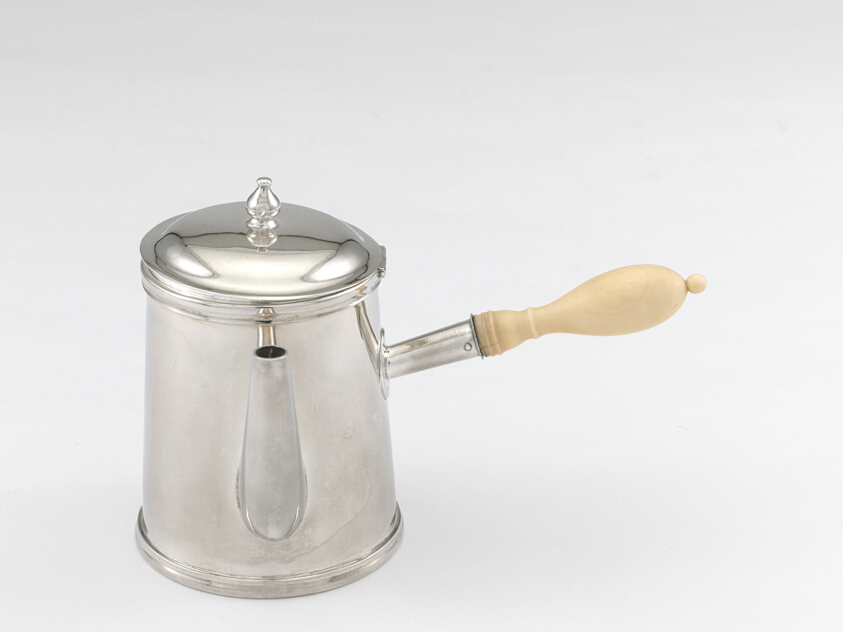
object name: Metalwork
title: Chocolate Pot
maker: Jones, Ball & Poor; American, 1846–1853; Boston Massachusetts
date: c. 1846–53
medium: Silver and ivory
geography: Boston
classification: chocolate pot; silver; vessel for serving drinks; american decorative arts; american arts; decorative arts